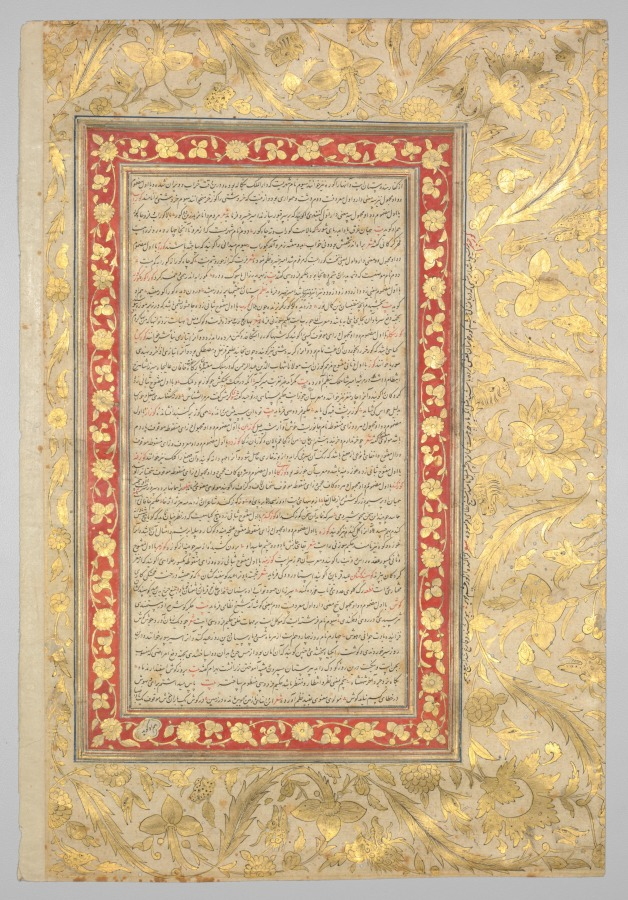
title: An Illuminated Folio from the Royal Manuscript of the Farhang-i Jahangiri (verso)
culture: Mughal India, court of Jahangir (1605–1627)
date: 1607–8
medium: Gum tempera, ink, and gold on paper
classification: Painting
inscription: Verso: “Gur” (name of a people in India) to “Gush” (morning east breeze, zephyr)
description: Farhang-i Jahāngīrī, one of the most complete and authoritative dictionaries of the Persian language, was compiled by Mir Jamal al-Din Husayn Inju. It took him 12 years to compile over 9,000 words with definitions and examples from verses by Persian poets. He was born in Shiraz, Iran, but lived most of his life in Agra, India, so the dictionary was named honor of the Mughal emperor Jahangir, who reigned from 1605 to 1627.